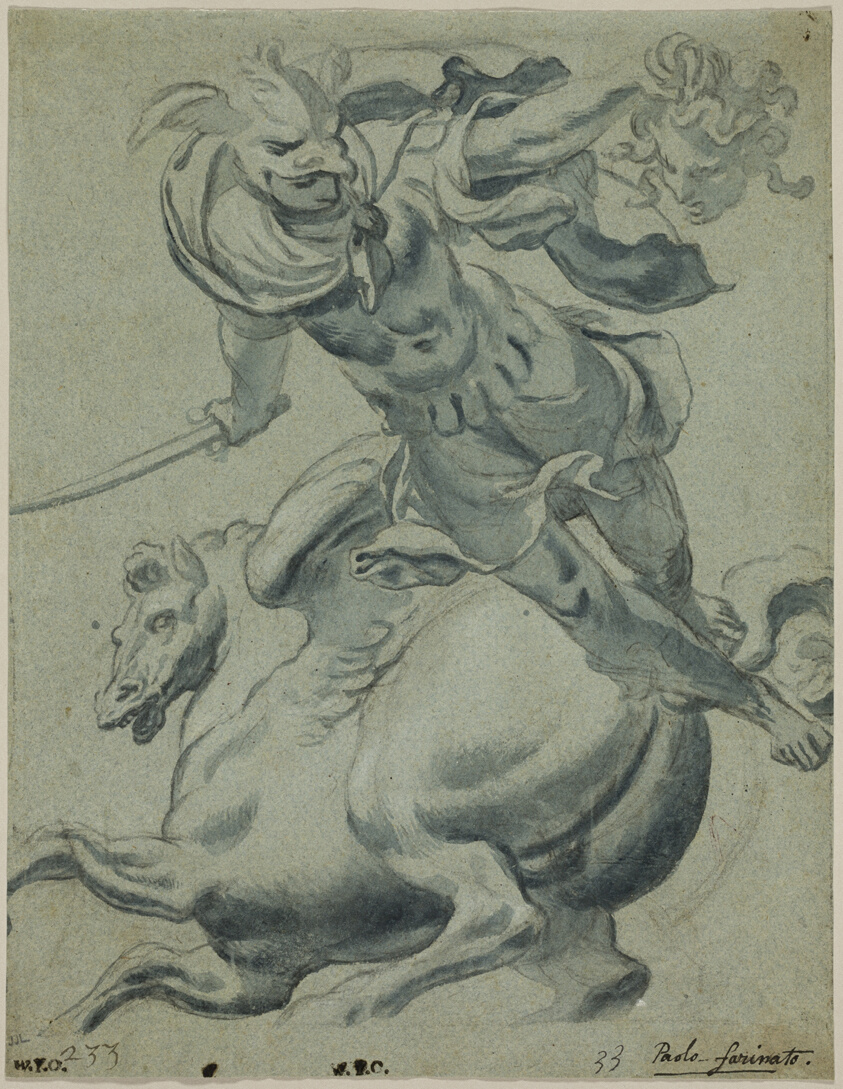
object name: Drawing and Watercolor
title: Perseus Holding the Head of Medusa, with Pegasus in the Background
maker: After Paolo Farinati; Italian, 1524-1606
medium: Brush and blue ink and wash, with traces of black chalk, on blue laid paper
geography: Italy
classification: ink and wash; drawings (visual works); prints and drawing